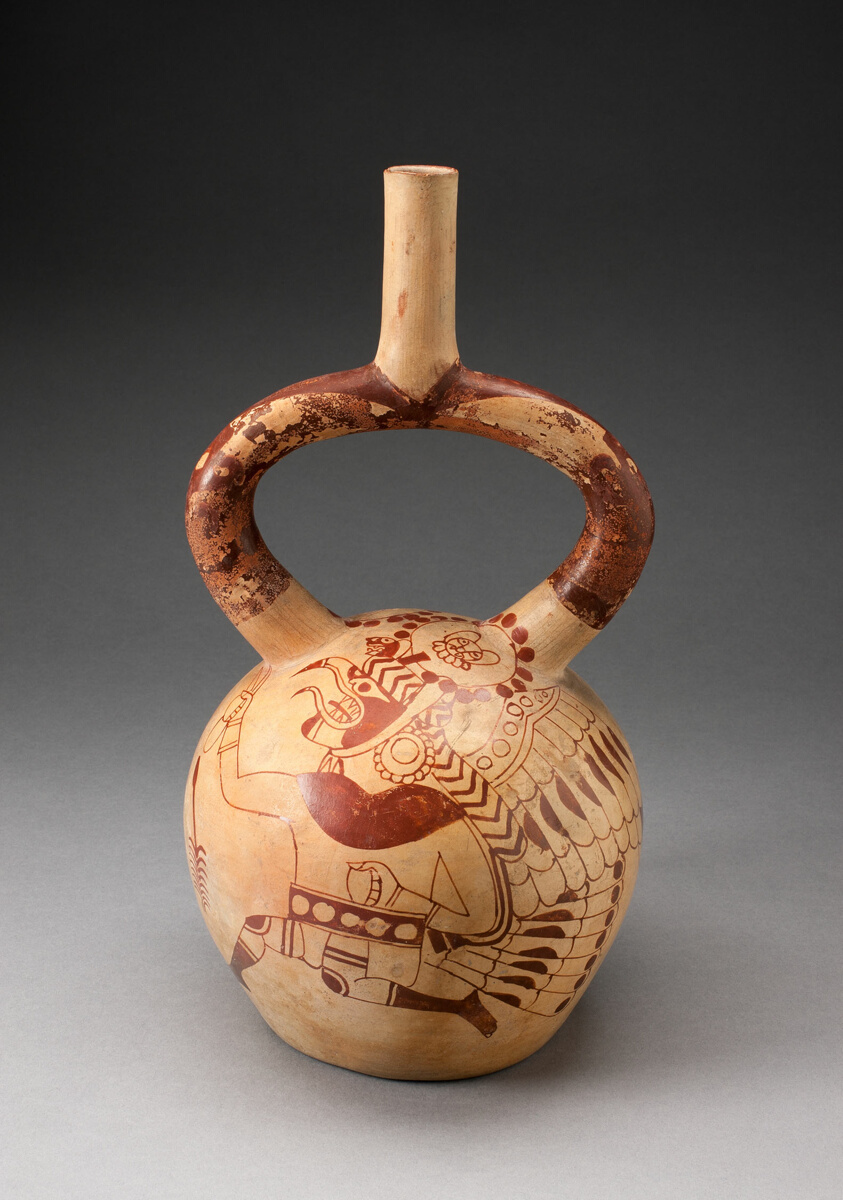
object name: Vessel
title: Stirrup Spout Vessel with Fineline Image of a Running Royal Messenger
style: moche, mochica, early intermediate period, Pre-Columbian, americas, Arts of the Americas, andean, andes, south american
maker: Moche (North coast, Peru)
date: 100 BCE–500 CE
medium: Ceramic and pigment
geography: Peruvian North Coast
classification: earthenware; art of the americas; ceramics; vessel